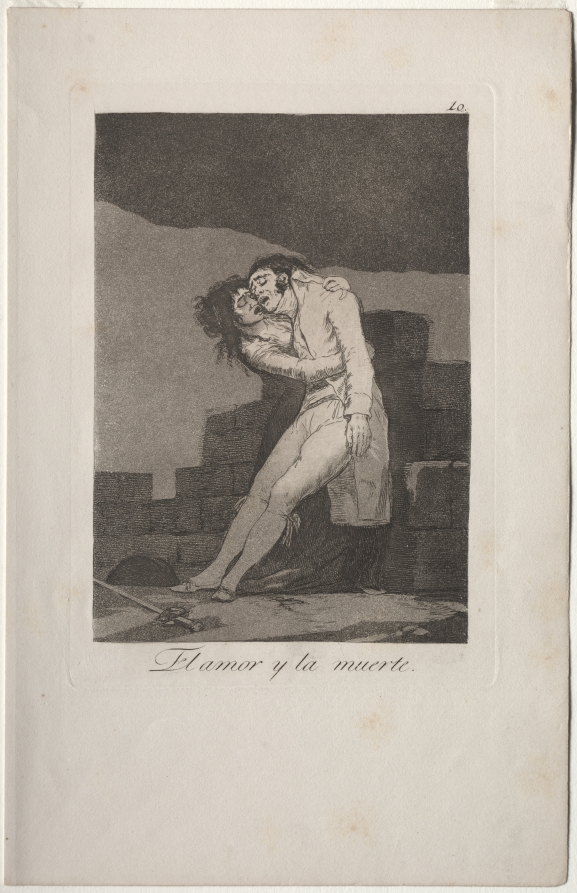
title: Love and Death, Plate 10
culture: Spain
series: Los Caprichos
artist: Francisco de Goya (Spanish, 1746–1828)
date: 1799, printed c. 1855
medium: etching and aquatint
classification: Print